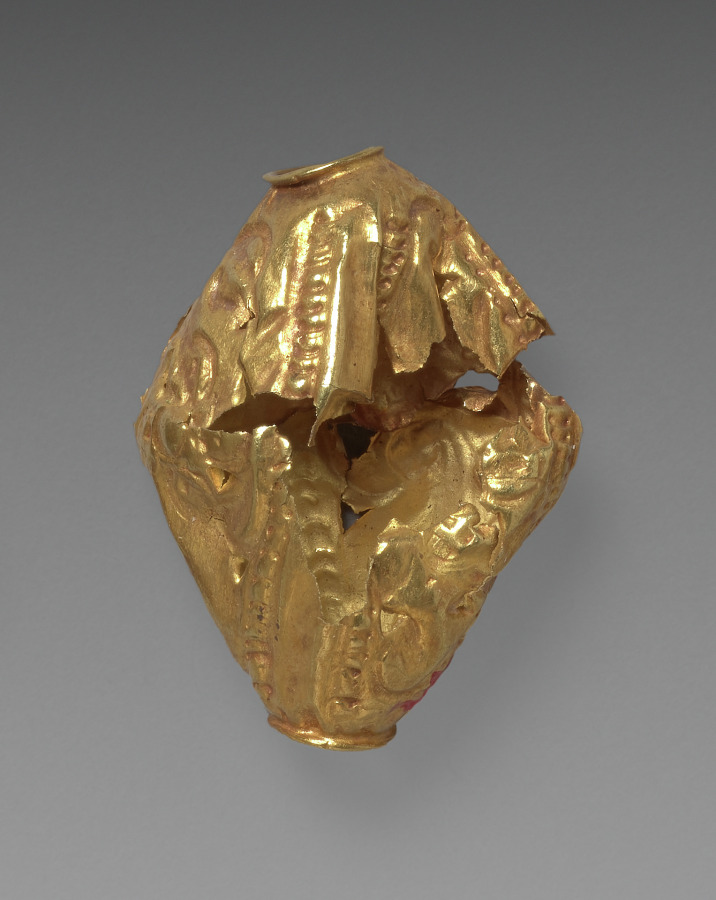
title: Bead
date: after 1519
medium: gold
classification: Jewelry